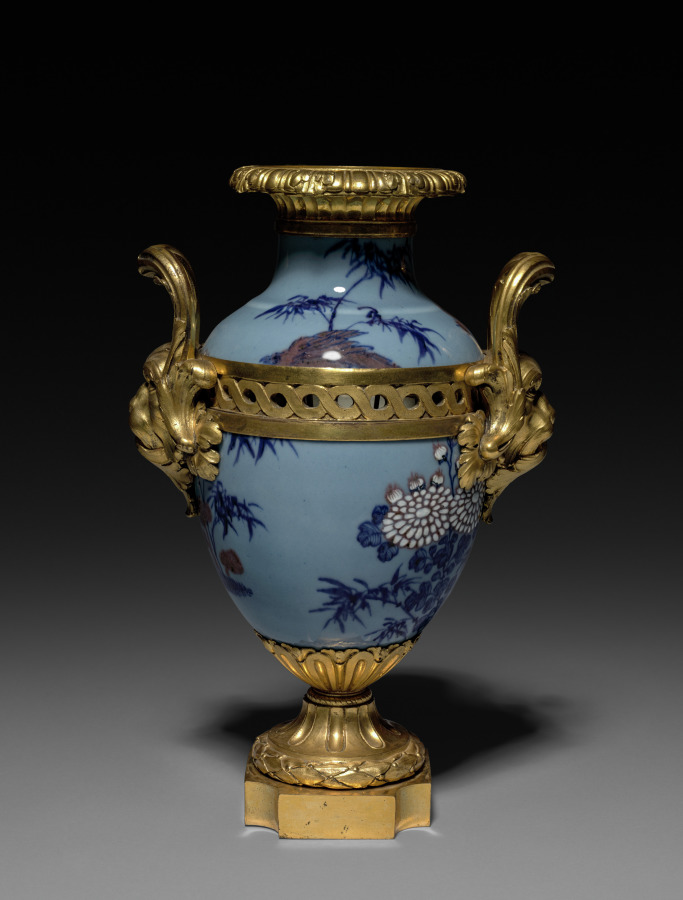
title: Vase for a Garniture Set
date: 1736–1770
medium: Chinese hard-paste porcelain, gilt bronze, enameled metal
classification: Furniture and woodwork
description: The fascination with Chinese porcelain among aristocratic circles increased during the reign of Louis XV. In reaction to the perceived excesses of elaborate naturalistic ornament of the 1750s, mount makers increasingly turned to neoclassical designs, known as Goût Grec (Greek taste) in the 1760s and 1770s. These beautifully chased gilt-bronze mounts feature classical Greco-Roman motifs such as lion masks, acanthus and laurel leaves, and pilasters.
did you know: A set of vases and clock, connected visually by the use of the same materials, often adorned a mantlepiece or the top of a large piece of furniture, such as a commode or console, within a room.